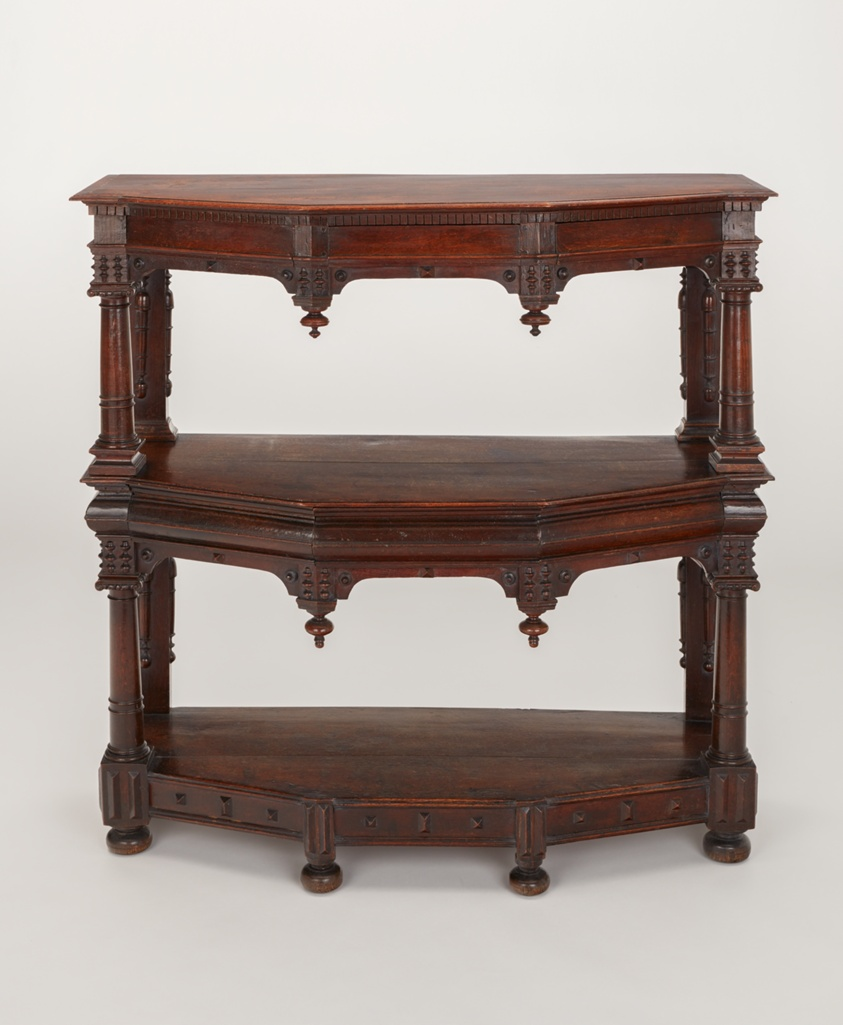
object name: Furniture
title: Court Cupboard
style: Mannerism, 17th Century, Baroque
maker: England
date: c. 1660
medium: Oak and iron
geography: England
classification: furniture; cupboard; decorative arts; european decorative arts; furnishings; Ionic; architectural detail; sideboard (furniture); woodwork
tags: display, banquet, Buffet, cupboard, England, English